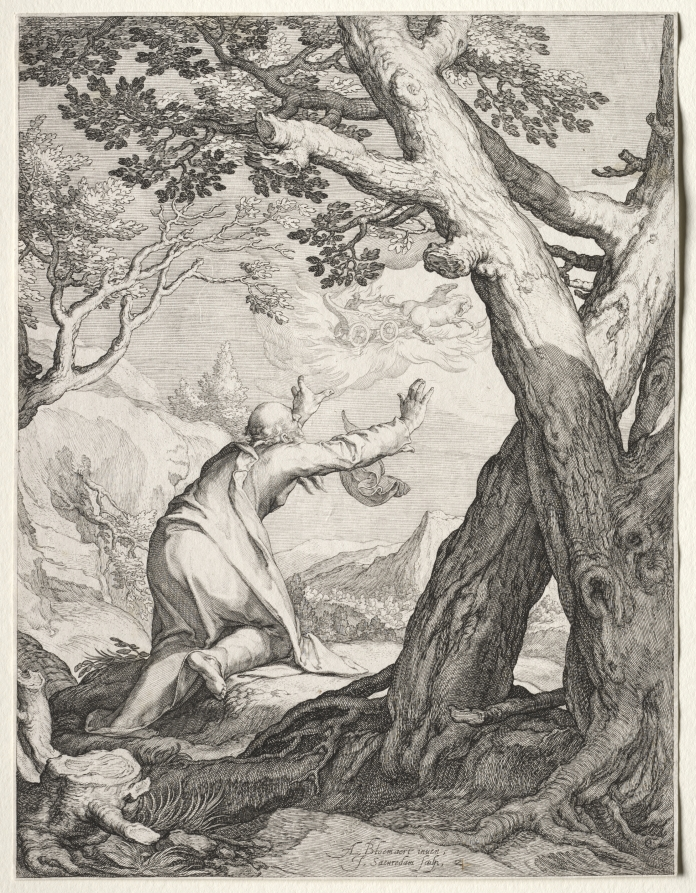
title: Elisha and Elijah's Chariot of Fire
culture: Netherlands, early 17th Century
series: Scenes of the Prophet Elijah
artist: Jan Saenredam (Dutch, 1565–1607)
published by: Jan Saenredam (Dutch, 1565–1607)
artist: after Abraham Bloemaert (Dutch, 1566–1651)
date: 1604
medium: engraving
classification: Print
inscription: lower center, in plate: A, Bloemaert inven, / J. Saenredam sculp. Z ; lower center, in yellow ink (over the ' Z'): 4 ; VERSO, lower left, in graphite: PvA ; across bottom, in graphite: Srem. Ep°. avec le numero 2 au lieu d'un 4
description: Elijah is perhaps best known for escaping death by ascending into heaven on a chariot of fire, an episode seen by many Christians as a foreshadowing of the Resurrection and Ascension of Christ.